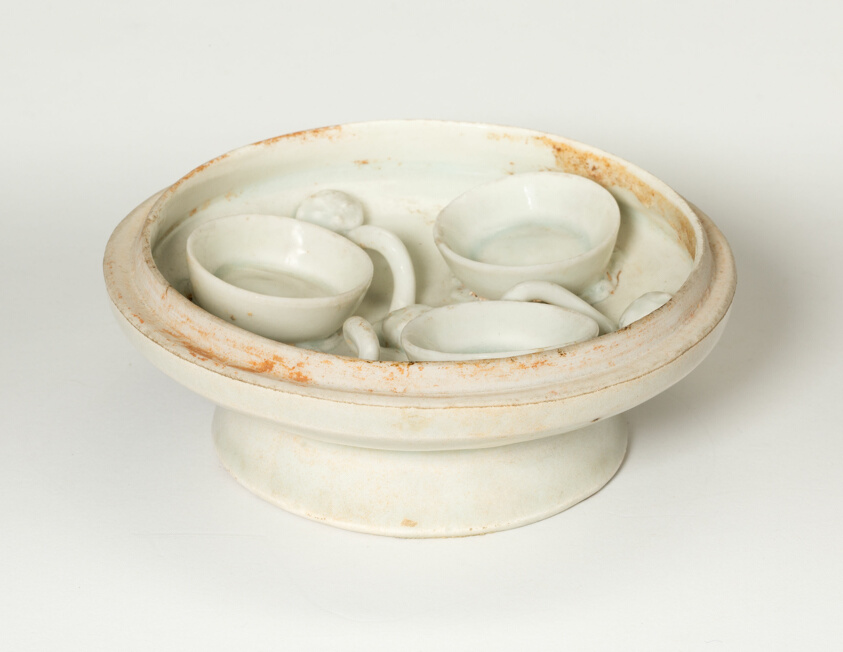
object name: Vessel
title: Covered Box with Lotus-Shaped Compartments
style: Chinese (culture or style)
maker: China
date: Song dynasty (960–1279)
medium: Qingbai ware; stoneware with underglaze molded and incised decoration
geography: China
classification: ceramics; asian art; vessel